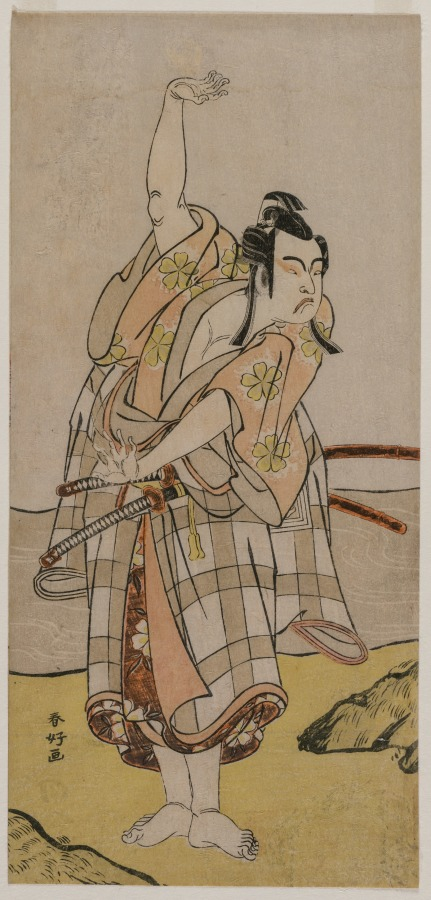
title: Actor Ichikawa Yaozō II as Sakuramaru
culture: Japan, Edo period (1615–1868)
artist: Katsukawa Shunkō (Japanese, 1743–1812)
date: 1776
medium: color woodblock print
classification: Print